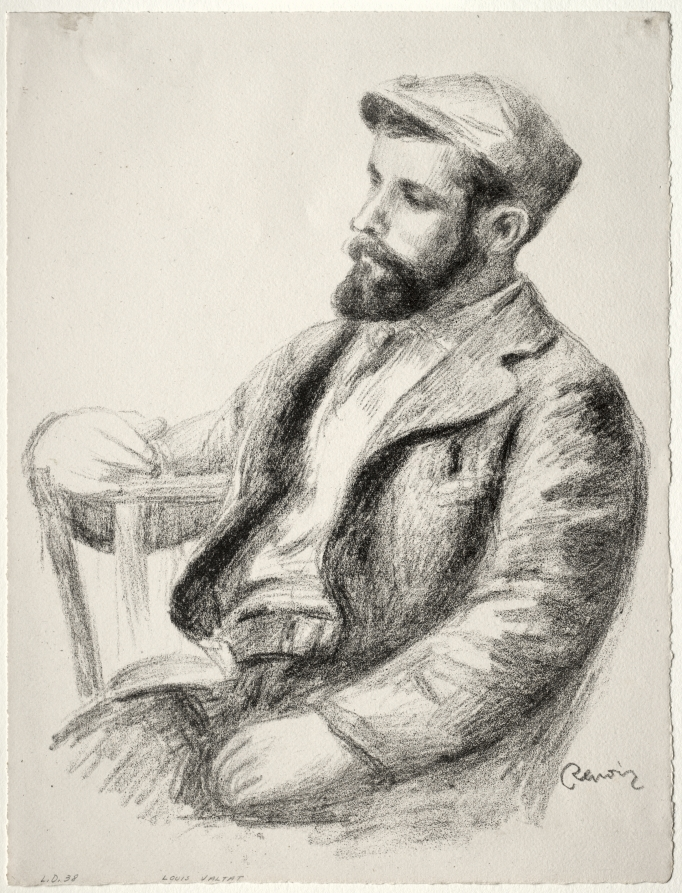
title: Louis Valtat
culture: France, late 19th-early 20th Century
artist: Pierre-Auguste Renoir (French, 1841–1919)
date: 1904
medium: lithograph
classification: Print